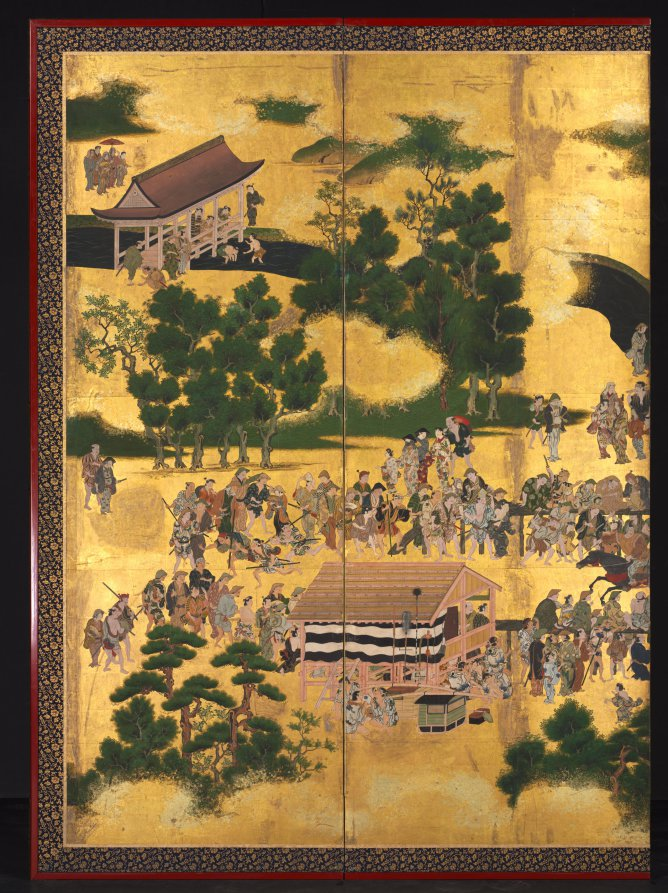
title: Horse Race at the Kamo Shrine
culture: Japan, Edo period (1615–1868)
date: early to mid-1600s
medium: One of a pair of six-panel folding screens; ink and color on gilded paper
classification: Painting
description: Kamo Shrine in Kyoto, seen in the upper half of the left screen, has held an annual horse race on May 5th since the ninth century. Serving as a snapshot of the festivities, this pair of screens captures nearly 600 people watching the race, beginning at the bottom part of the right screen and continuing to the left. The race is a great spectacle where aristocratic riders cling to their fast and unwieldy mounts. While many of those in attendance seem in rapt attention to the main event, other vignettes depict people engaged in an array of activities. This pair of screens was likely originally part of a group of linked murals.